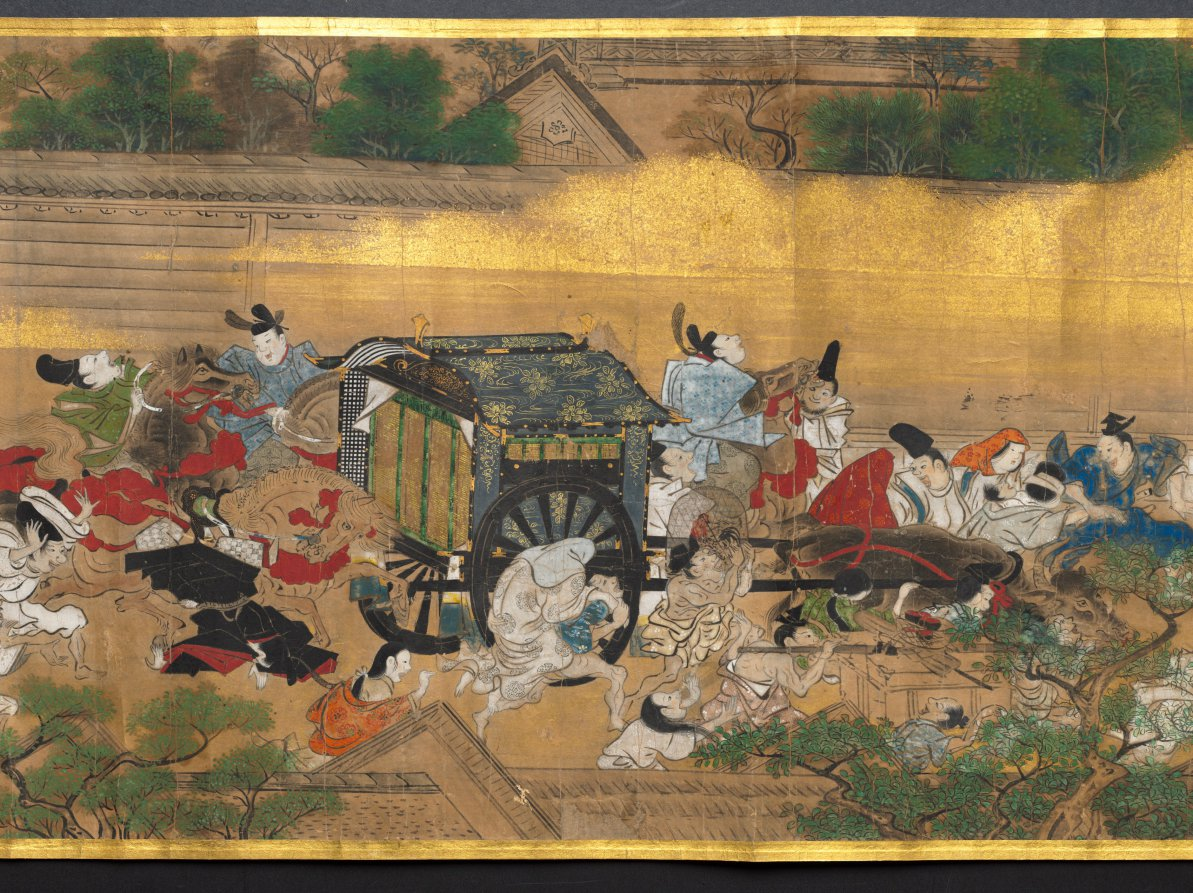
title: People Fleeing from a Fire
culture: Japan, Edo period (1615–1868)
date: 1615–1868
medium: Handscroll; color and gold on paper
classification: Painting